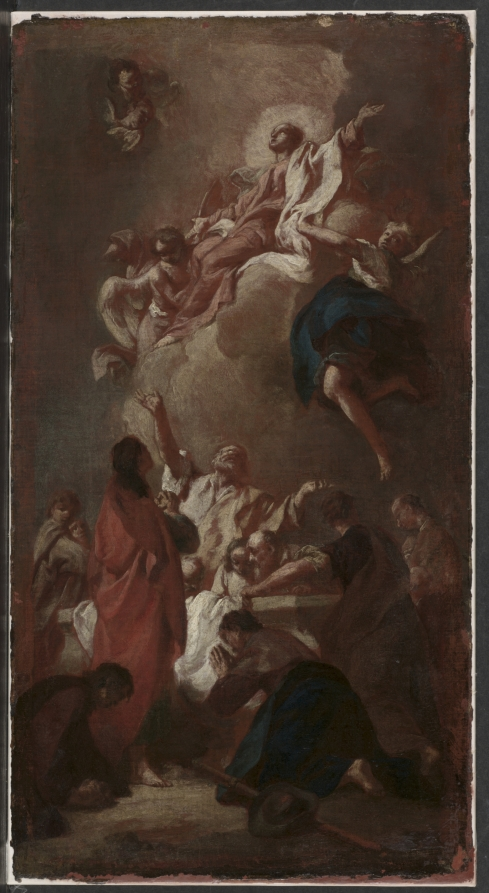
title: Sketch for "The Assumption of the Virgin" (for St. James, Zbraslav, near Prague)?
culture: Italy, 18th century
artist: Giovanni Battista Piazzetta (Italian, 1682–1754)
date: c. 1744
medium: oil on canvas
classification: Painting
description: According to Roman Catholic theology, the Assumption is the movement of the Virgin Mary's body and soul into heaven. Thus the central figure of the Virgin dominates this scene of the Assumption, outstretching her arms and supported by two angels as she ascends into heaven. Below, saints surround the Virgin's tomb. St. Peter reaches for the foot of the ascending Virgin, suggesting a connection between heaven and earth. Giovanni Battista Piazzetta created this work as a sketch for his larger altarpiece commissioned in 1743 for the Church of St. James in Zbraslav, near Prague. The Assumption of the Virgin is a rare oil sketch by Piazzetta, and the larger composition adheres closely to this model. One difference between the sketch and the altarpiece is that the saints are illuminated more in the preliminary work. A divine light shines on the faces of the Virgin and the figures below her. Above the other figures, the Virgin appears remote and focuses on heaven as she looks upwards and beyond the painting's borders. The grouping of the figures in the center of this painting creates a vast surrounding space which fittingly gives this altarpiece sketch a sense of monumentality.